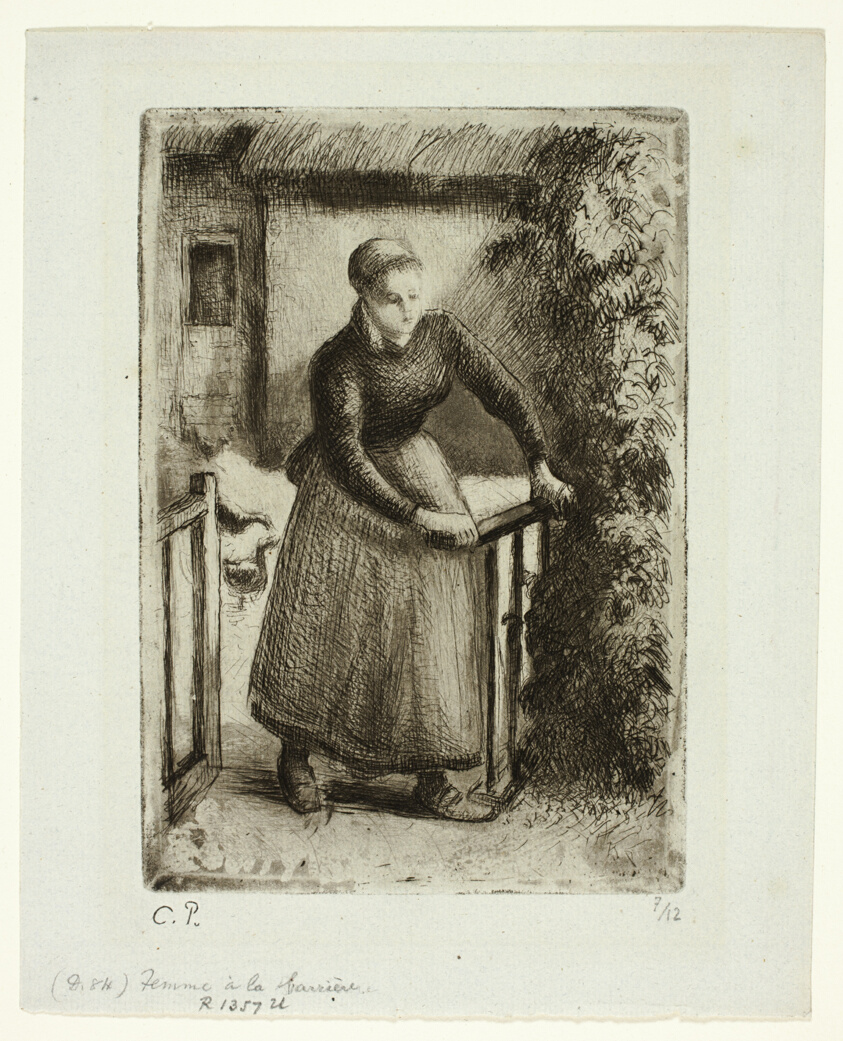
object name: Print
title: Woman at the Gate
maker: Camille Pissarro (French, 1830-1903)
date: 1889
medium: Etching, aquatint, and drypoint in black on green-blue laid paper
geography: France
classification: etching; print; prints and drawing